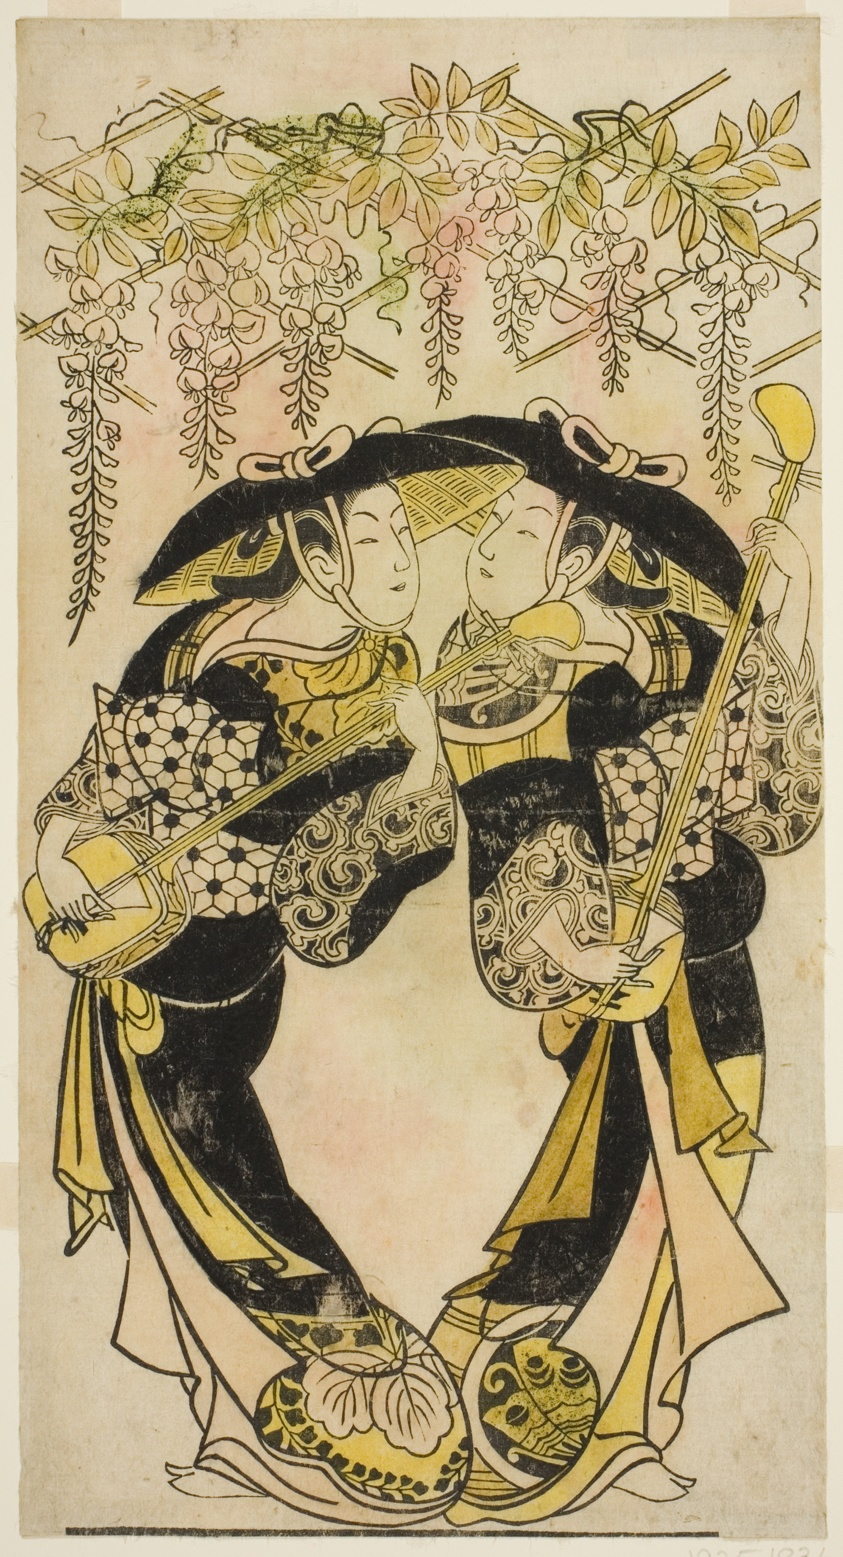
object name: Print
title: The Actors Sanjo Kantaro (right) and Fujimura Handayu (left) as musicians playing under wisteria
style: Japanese (culture or style)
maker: Artist Unknown; Japanese, 18th century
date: c. 1717/18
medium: Hand-colored woodblock print; hosoban, urushi-e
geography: Japan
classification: woodblock print; print; asian art